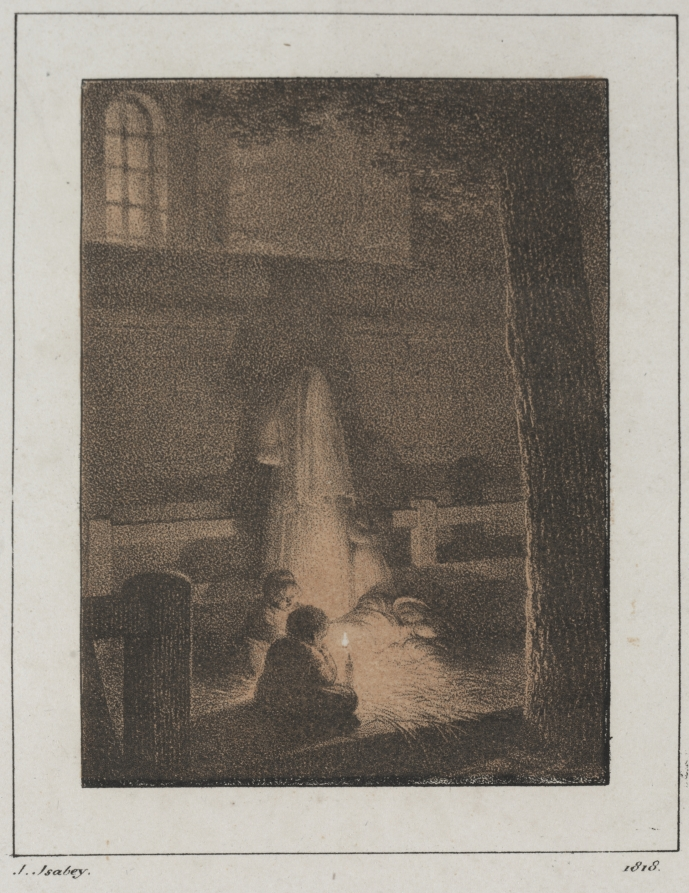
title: Children with Candle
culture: France, 19th century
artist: Jean-Baptiste Isabey (French, 1767–1855)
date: 1818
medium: lithograph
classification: Print